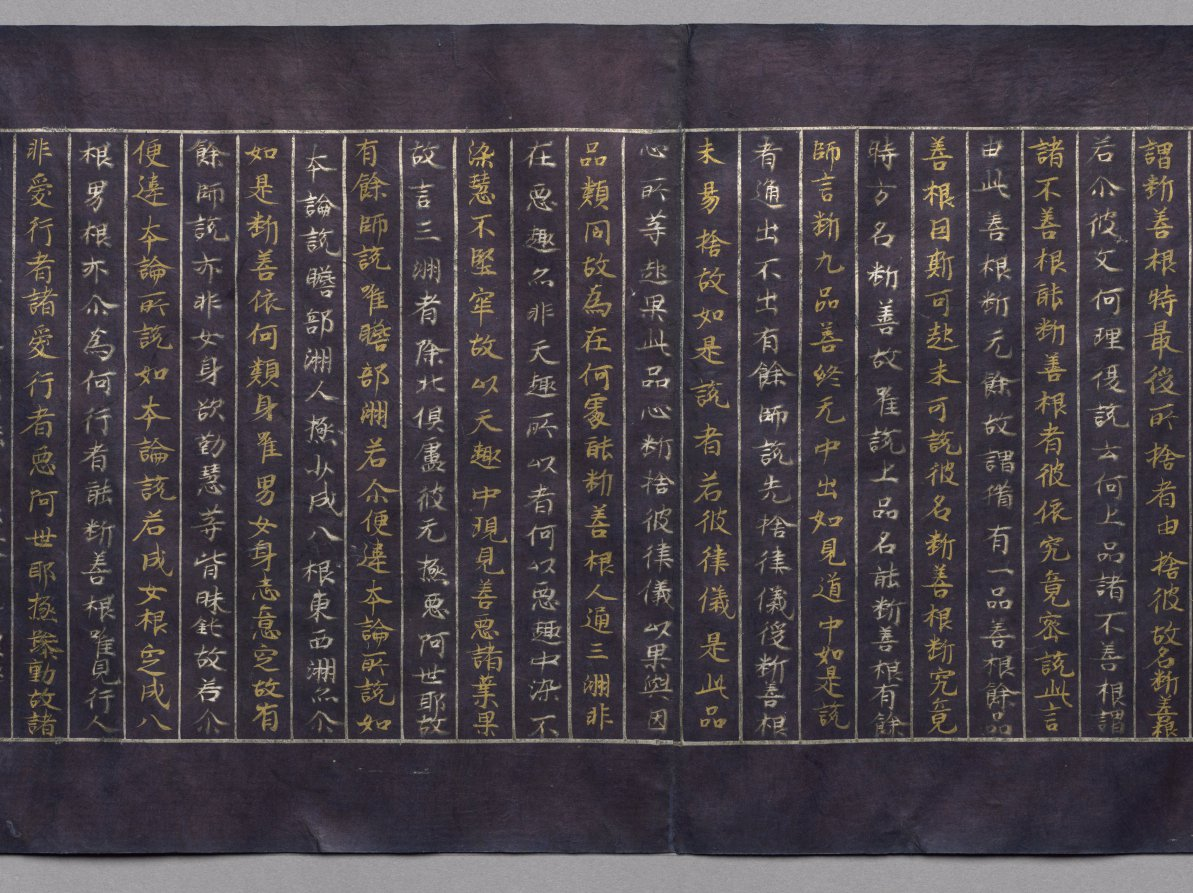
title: Meta-Discourse on the Teachings from the Treasury (Abidharmakosha-Bhashya)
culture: Japan, Heian period (794–1185)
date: 1100s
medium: handscroll; gold and silver on indigo-dyed paper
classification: Manuscript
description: This religious text relates some of the teachings of the great fourth-century Indian Buddhist scholar Vasubhandhu. The text analyzes human consciousness in its relationship to the environment and transformations that occur during meditation. This scroll is the 17th part of a 30-part translation of the text by Xuanzang, an eminent seventh-century Chinese monk.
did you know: The frontispiece depicts the Buddha Shakyamuni preaching in a paradisical landscape.